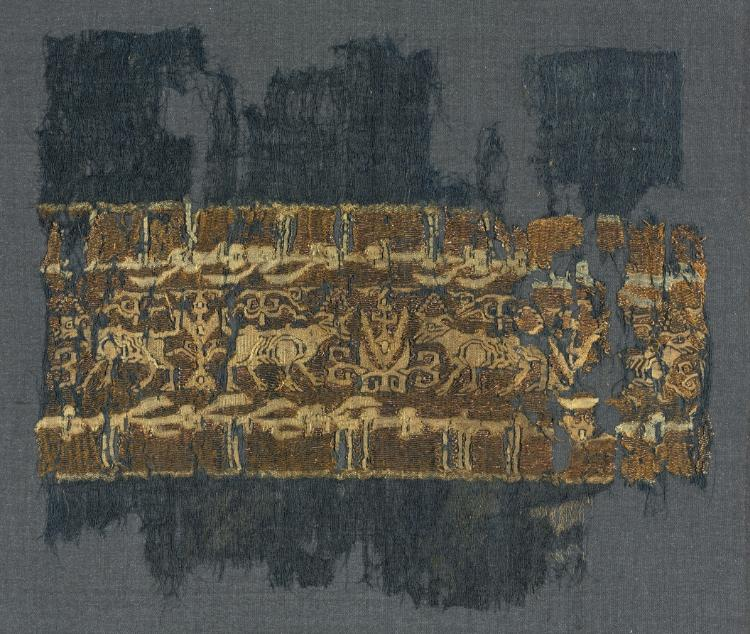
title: Tiraz with gold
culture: Egypt, Fatimid period, reign of Caliph al-Zahir, 1020–1035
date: 1020–35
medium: plain weave with inwoven tapestry weave: linen, silk, and gold filé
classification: Textile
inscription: Lower line (inverted): "[In] the name of God, the Merciful, the Compassionate. There is no god but Allāh alone." Upper line: "[son of the imam al-Haki]m bi-amr-Allāh, Commander of the Faithful, God's benedictions."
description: The dominant gold ground of a tripartite band displays horned bovines with cloven hooves alternating with stylized palmette trees flanked by opposing lines of text on the dark blue linen ground. The historical inscription is written in kufic script with elongated bowls of the lower letters. The text and epigraphy indicate a date during the caliphate of al-Zahir (r. 1020–35).